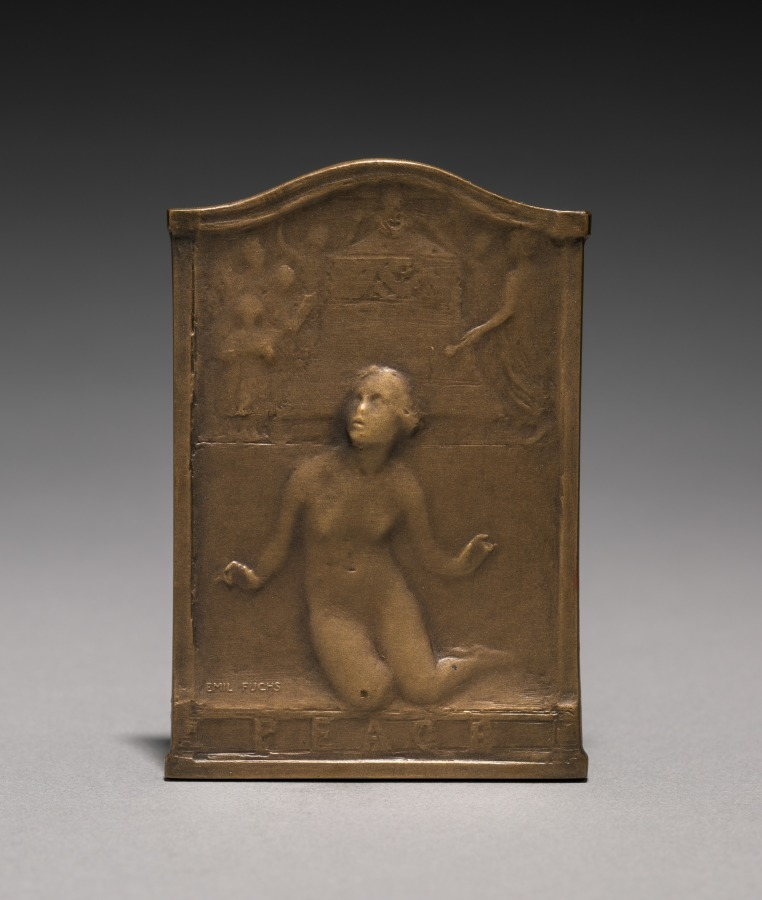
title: Medal: Commemorates the Signing of Peace, No. 40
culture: America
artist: Emil Fuchs (American, born Austria, 1866–1929)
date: 1918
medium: bronze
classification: Metalwork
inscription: "PEACE."